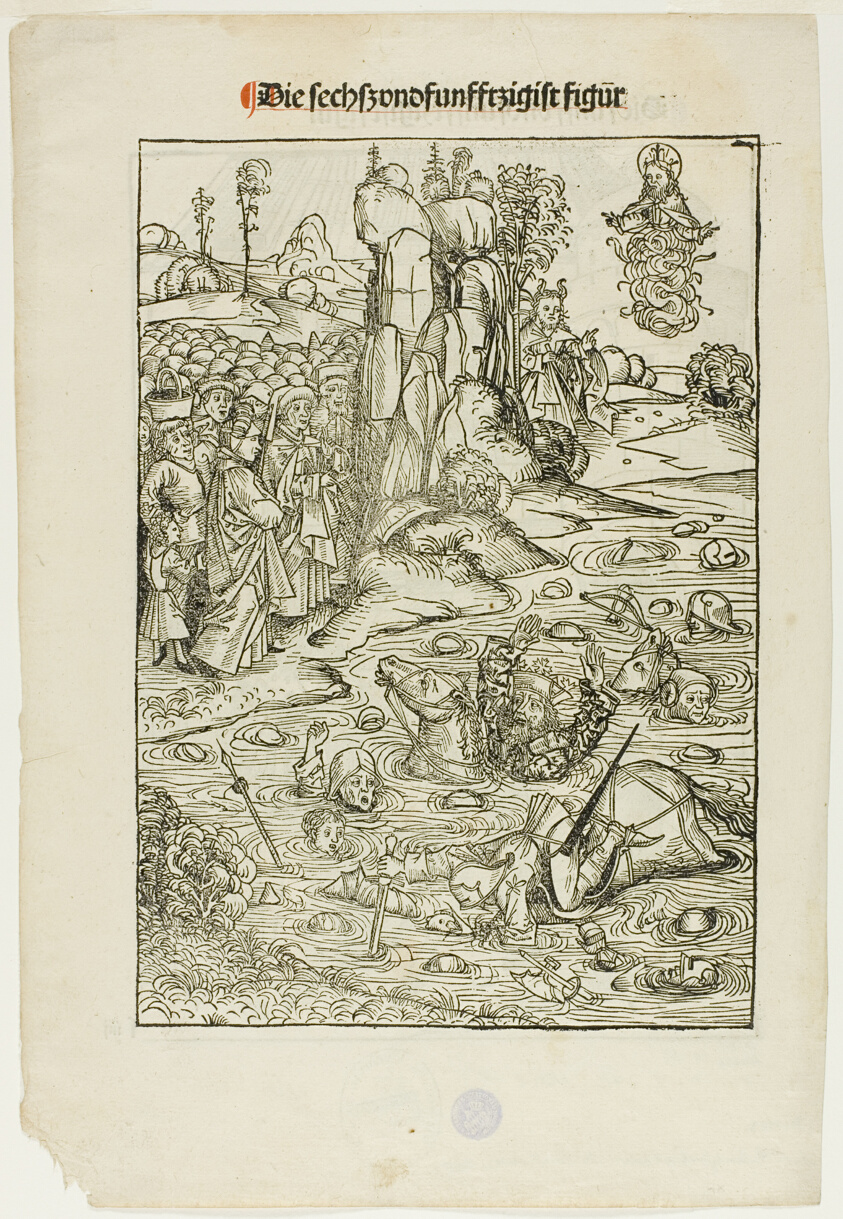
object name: Print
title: Pharoah and His Host Perishing in the Red Sea (verso); The Freeing of King Joachim of Jerusalem (recto), pages 56 and 55, from the Treasury (Schatzbehalter)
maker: Michael Wolgemut and Workshop (German, 1434/37–1519); published by Anton Koberger (German, 1440–1513)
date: 1491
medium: Woodcut in black on cream laid paper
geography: Germany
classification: woodcut; print; prints and drawing